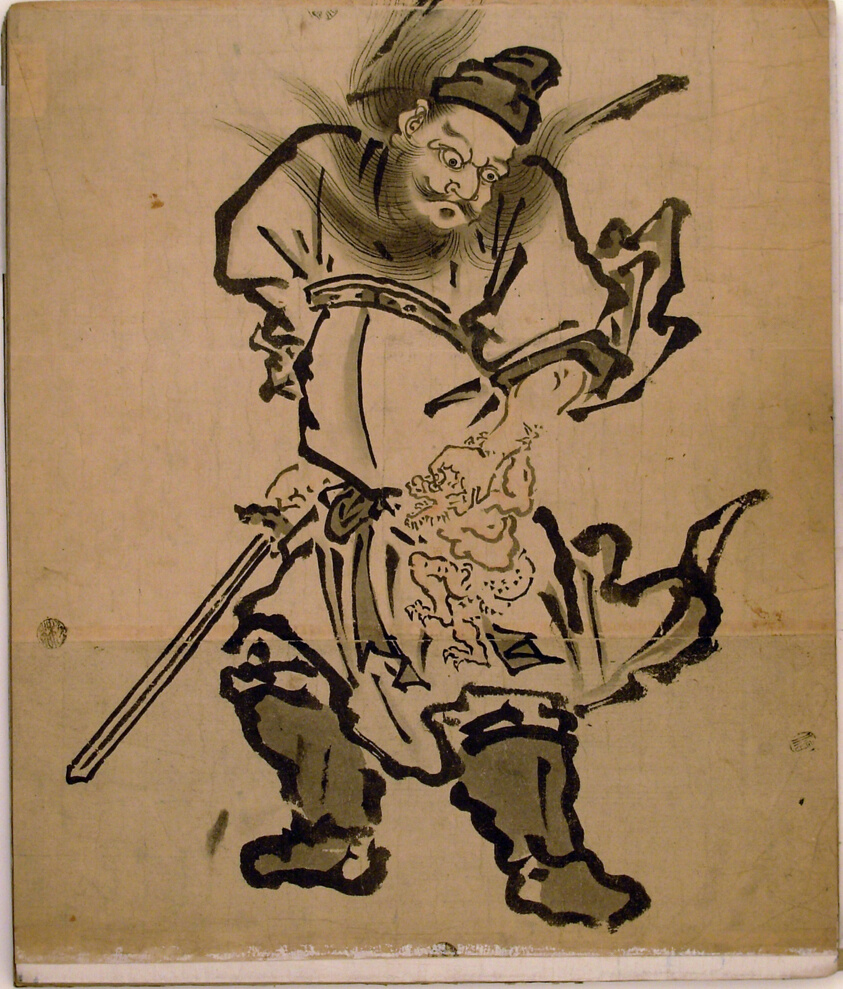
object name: Drawing and Watercolor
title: Shôki the Demon Queller, from an album of paintings of Shôki, Edo period (1615–1868)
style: Japanese (culture or style)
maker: Artist unknown; Japanese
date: Edo period, 18th century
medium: Album; ink on paper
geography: Japan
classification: album/sketchbook; asian art